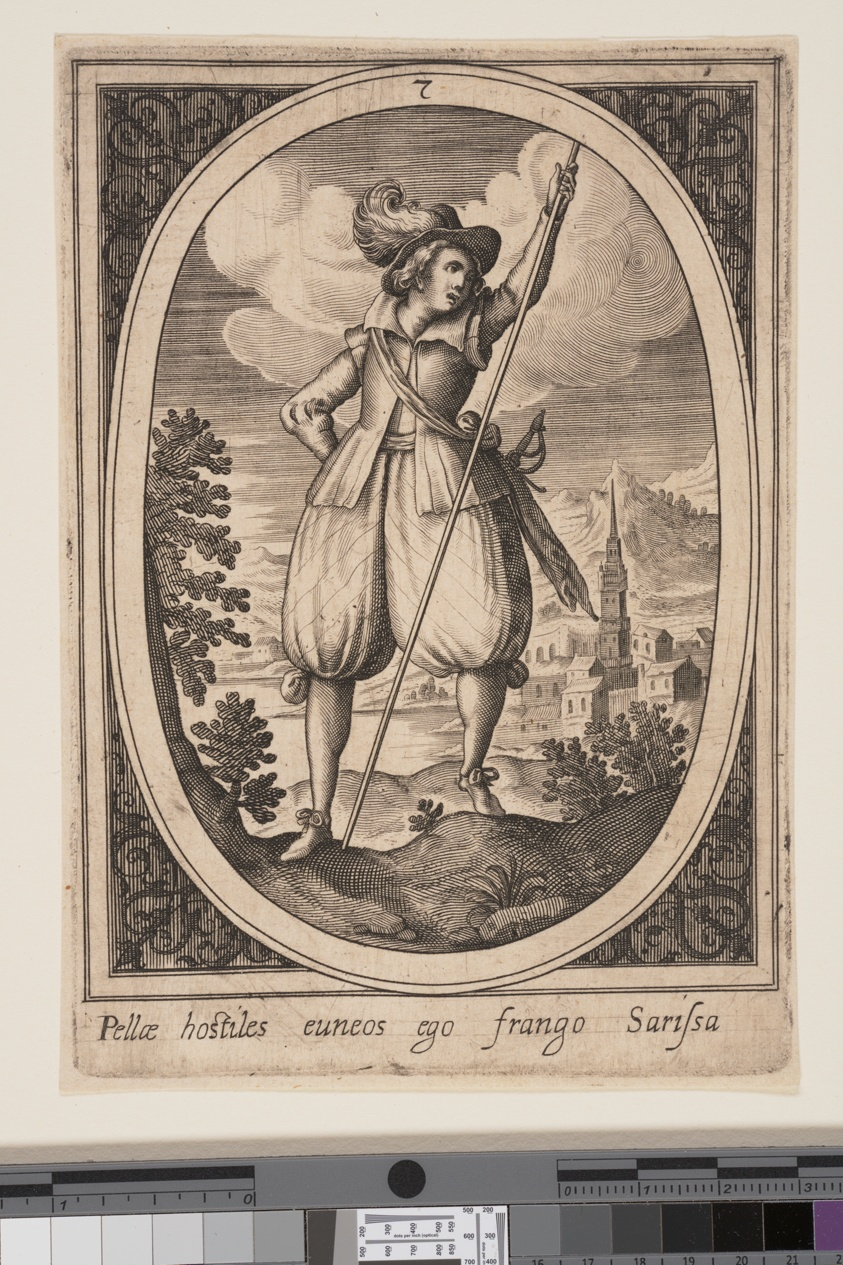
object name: Print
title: Plate 7 from Military Figures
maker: Attriuted to Heinrich Ulrich (German, c. 1572-1621); possibly after Paul Mair (German, active c. 1600)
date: c. 1590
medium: Engraving on ivory laid paper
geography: Germany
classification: engraving; paper; print; prints and drawing